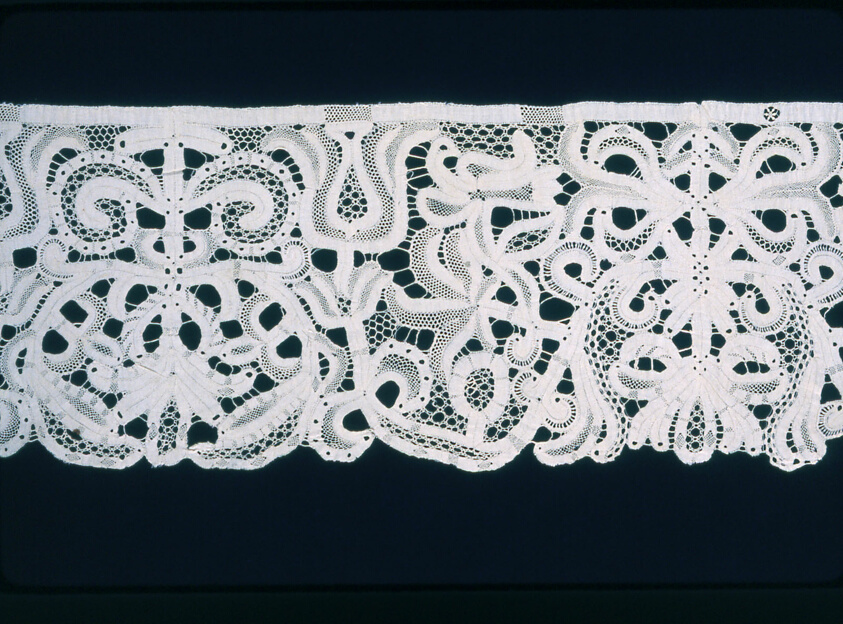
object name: Textile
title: Flounce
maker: Northern Italy, possibly Milan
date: 1701/25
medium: Linen, bobbin part lace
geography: Italy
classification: textile; lace - bobbin